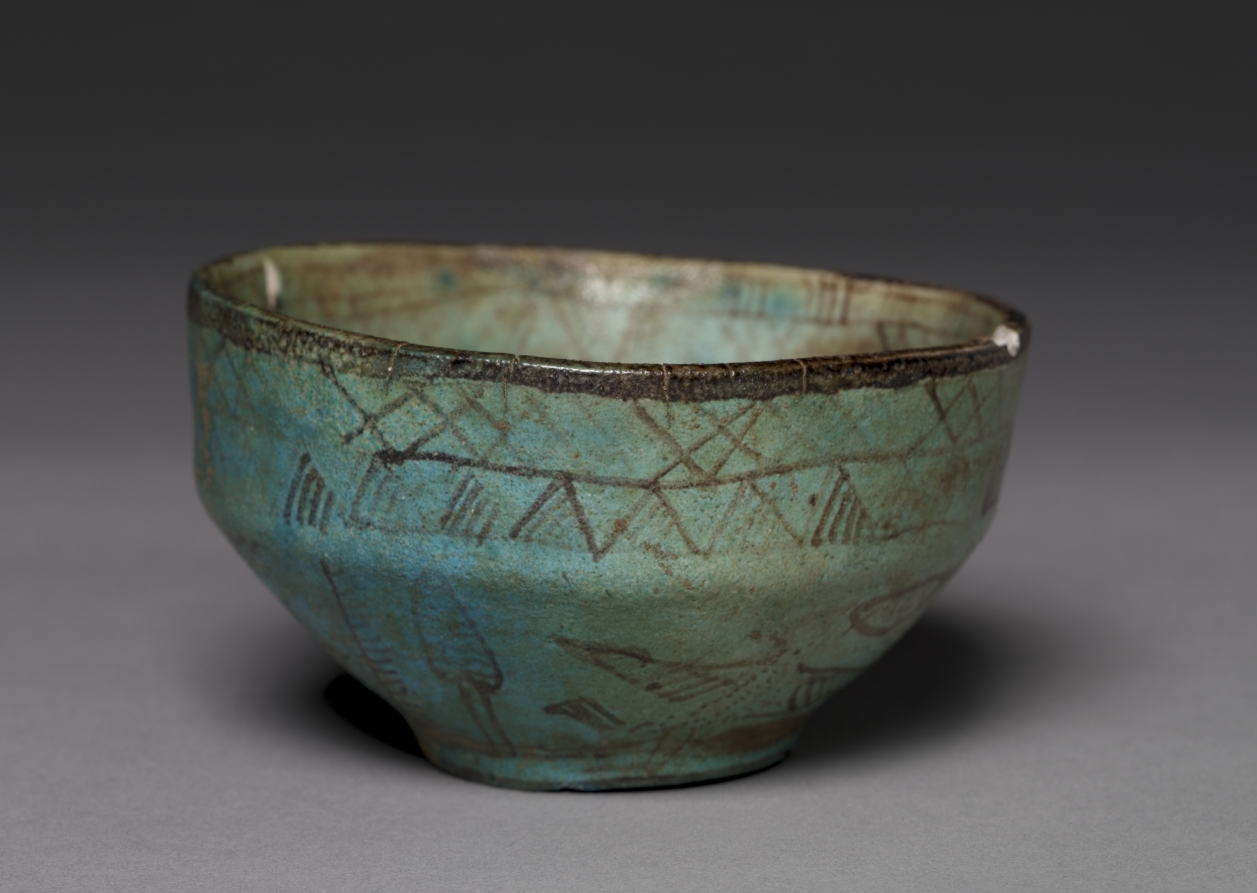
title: Decorated Bowl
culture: Egypt, Middle Kingdom (2040–1648 BCE)–New Kingdom (1540–1069 BCE)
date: 1980–1801 BCE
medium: turquoise faience with black painted decoration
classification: Vessels